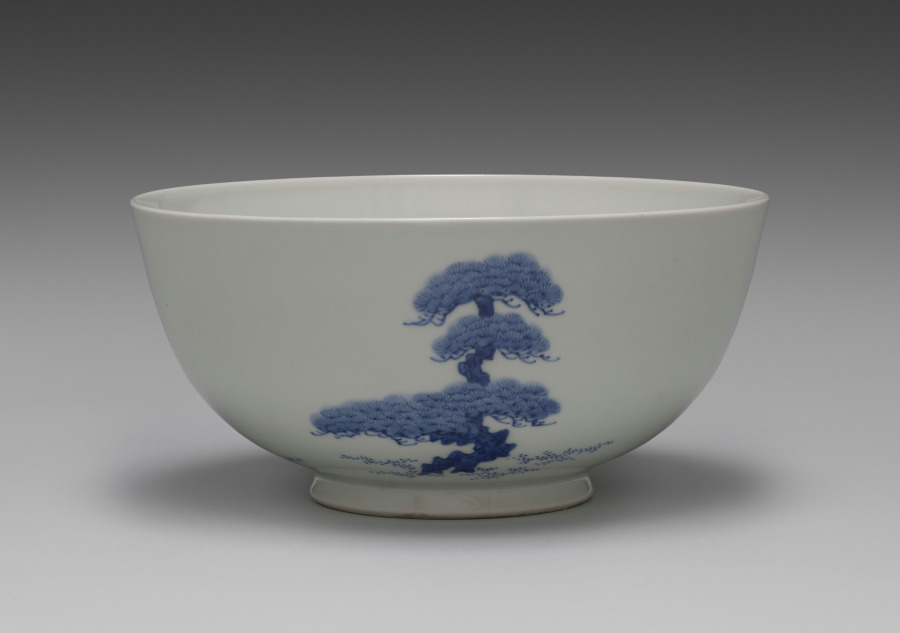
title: Bowl with Pines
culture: Japan, Meiji period (1868–1912)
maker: Seifū Yohei III (Japanese, 1851–1914)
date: 1893–1914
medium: porcelain with underglaze blue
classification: Ceramic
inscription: Inscription by Seifū Yohei IV on the box states that the bowl is the work of Yohei III.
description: The bowl has slightly more detailed surface designs painted in blue under the glaze than some other Yohei III's other teaware, like the Water Cooler with Pines, CMA 2022.163. The three pines, with two, three, and four racks of boughs respectively, have more angular rather than curved trunks, with clearly articulated bark.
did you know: The box for the bowl carries an attestation by Yohei IV that it is the work of his predecessor.